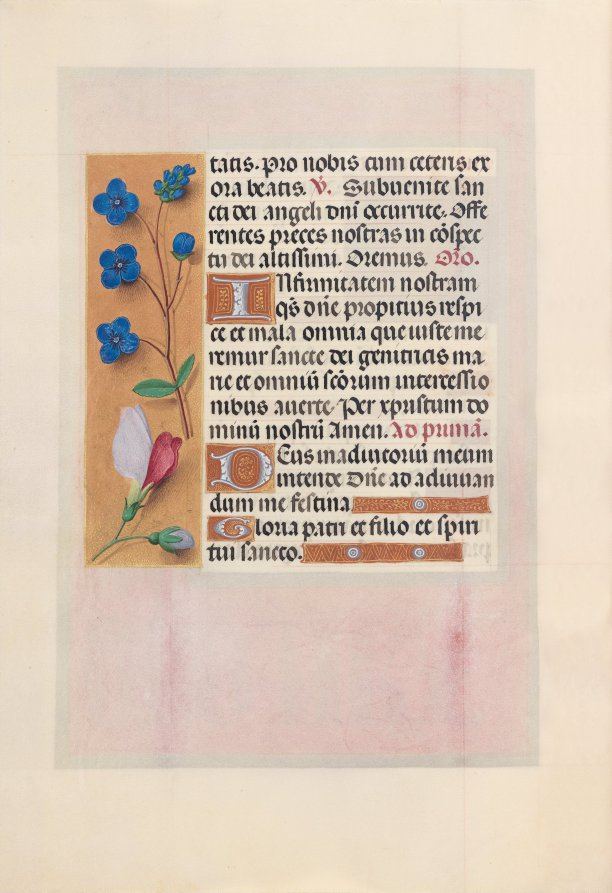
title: Hours of Queen Isabella the Catholic, Queen of Spain: Fol. 38v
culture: Flanders, Ghent and Bruges, late 15th century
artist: Master of the First Prayerbook of Maximillian (Flemish, c. 1444–1519)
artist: and Associates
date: c. 1500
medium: ink, tempera, and gold on vellum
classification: Bound Volume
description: This manuscript was illuminated by a circle of at least five highly organized manuscript painters active in the Flemish cities of Ghent and Bruges. The principal illuminator was Alexander Bening, who painted the majority of the book's miniatures. Manuscripts produced by this circle of artists are renowned for the decoration of their borders, which typically feature a rich variety of realistically-painted flowers, birds, and butterflies. This prayer book, called a book of hours, was intended not for a cleric, but for the private devotions of a lay person-in this case, Isabella the Catholic, Queen of Spain (1451-1504). Isabella's coat of arms embellishes the book's frontispiece. It is unlikely that the book was commissioned by the Queen herself; rather, she probably received it as a diplomatic gift from someone courting her patronage, perhaps Cardinal Francisco Jimenez de Cisneros. A Franciscan friar, Jimenez was dependent upon Isabella for his advancement, first to the post of Queen's confessor in 1492, and then to Archbishop of Toledo in 1495.